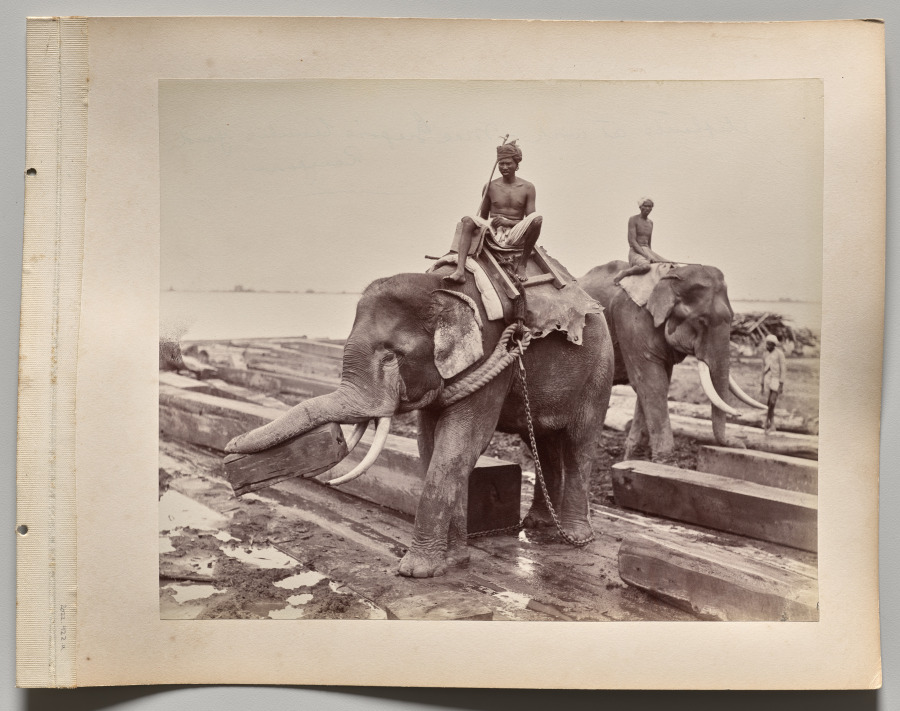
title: Untitled (elephants moving blocks of wood) (recto)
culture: England, 19th century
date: 1870s-1880s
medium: albumen print mounted on an album page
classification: Photograph